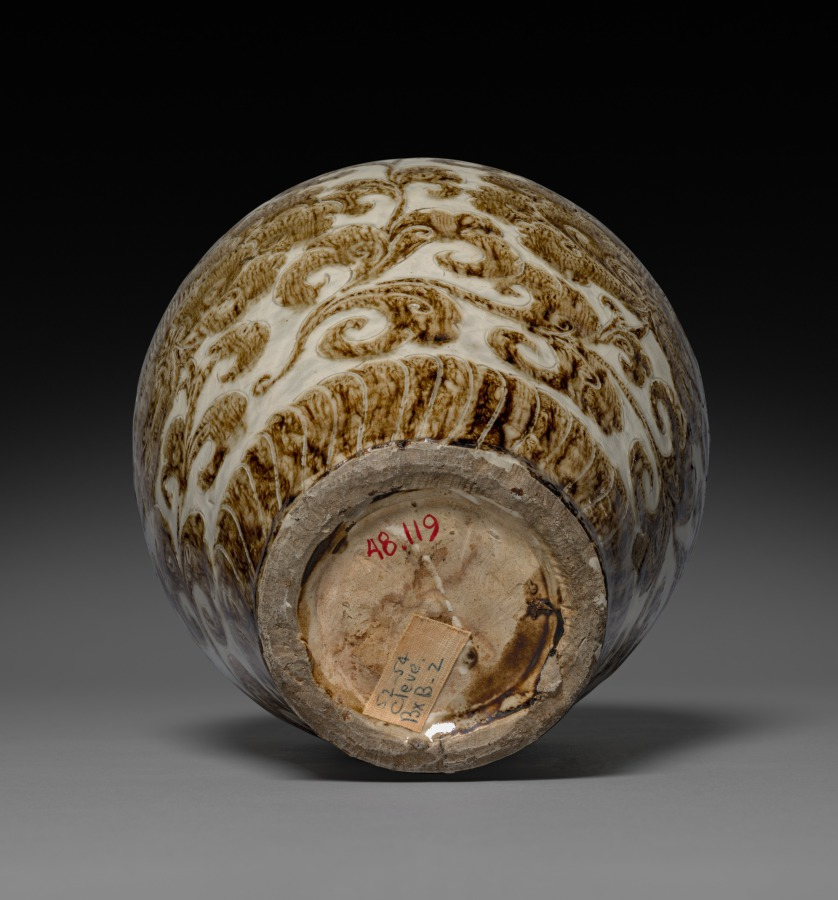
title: Meiping Vase: Cizhou Ware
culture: China, Northern Song dynasty (960-1127)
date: 1100s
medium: Buff stoneware with carved underglaze slip decoration, Cizhou ware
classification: Ceramic